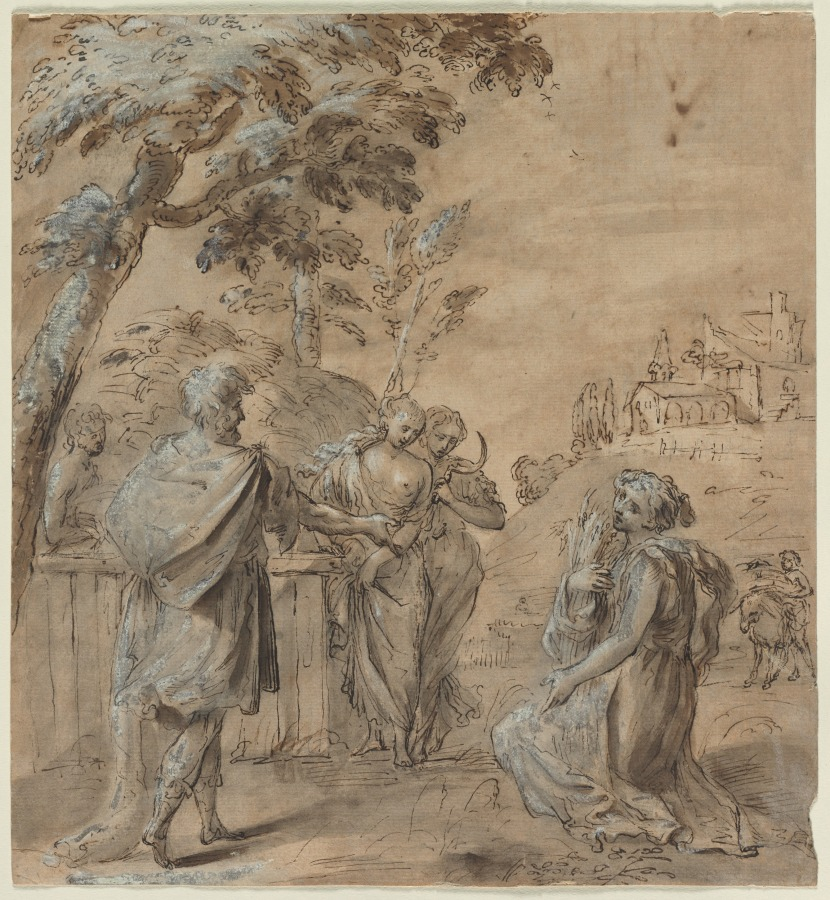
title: Ruth and Boaz (recto) The Fall of Simon Magus (verso)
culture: Italy, 17th century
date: 1600s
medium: pen and brown ink and brush and brown wash over black chalk, heightened with lead white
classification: Drawing